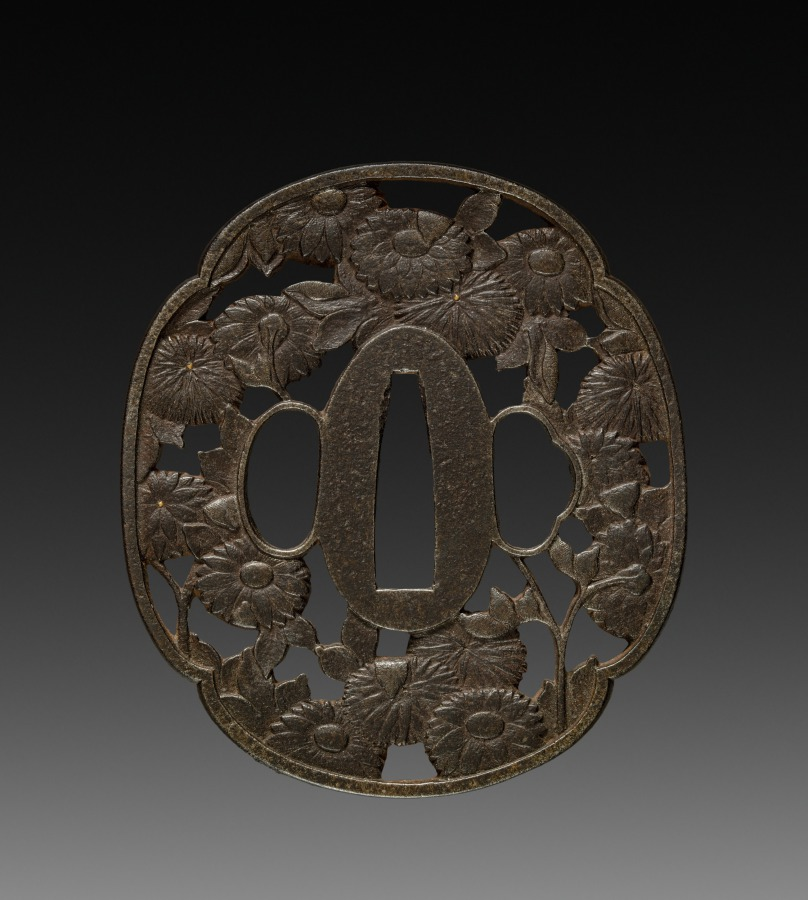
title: Sword Guard (Tsuba) with Chrysanthemums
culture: Japan, Edo period (1615–1868)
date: 1800s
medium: bronze?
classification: Metalwork